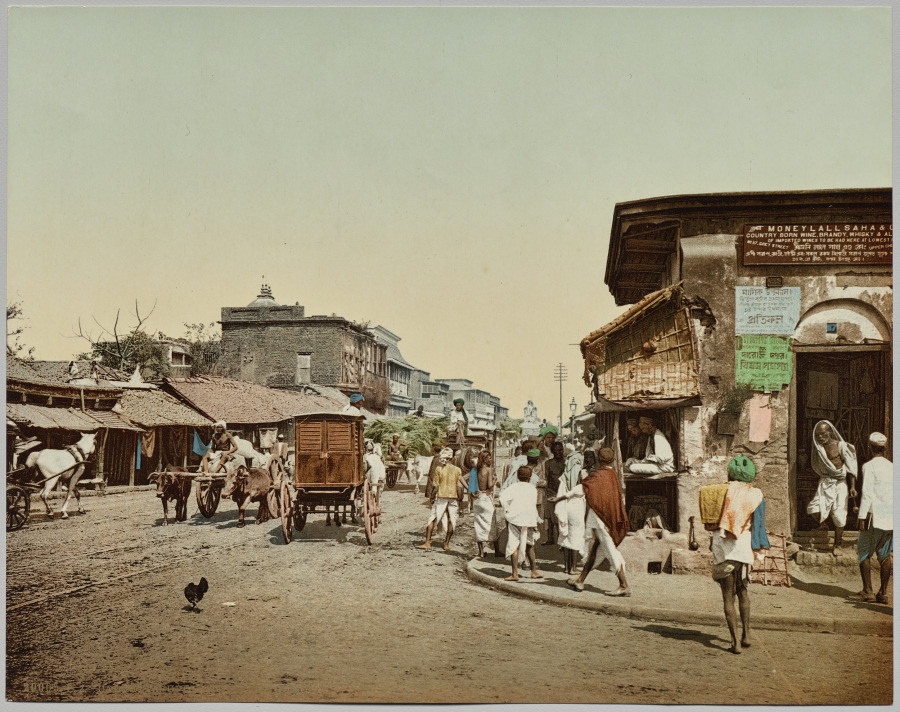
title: India. Calcutta. Upper Chitpore Road (A), after photo by Dr. Kurt Boeck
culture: India, 19th century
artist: Photoglob Co. (Zurich, active c. 1890–1910)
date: c. 1890–1910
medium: Photochrom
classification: Photograph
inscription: Imprinted in gold type on recto: “20005.P.Z-CALCUTTA. UPPER CHITPORE ROAD.”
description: This busy street corner gives us a glimpse into everyday life in turn-of-the-twentieth-century India. Unlike most of the mid-19th century genre photographs of colonial India, which were posed or staged, here people go about their business, unaware that they are being photographed. The color scene was made using a black-and-white negative by Dr. Kurt Boeck, a German actor and mountain climber who became a travel writer and lecturer specializing in Asia.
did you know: Chitpore (now spelled Chitpur) Road is one of the oldest roads in Kolkata (previously Calcutta).